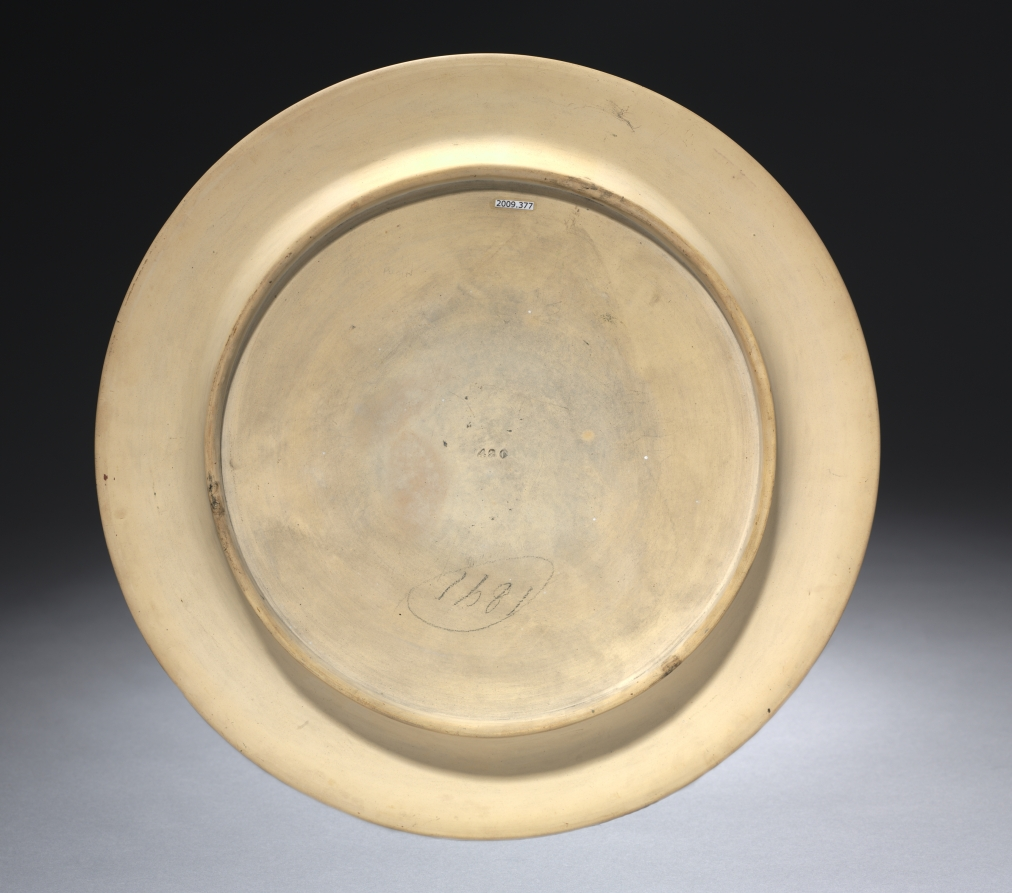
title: Bread Plate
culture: England, 19th century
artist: Augustus Welby Northmore Pugin (British, 1812–1852)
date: c. 1850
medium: stoneware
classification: Ceramic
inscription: around the perimeter of the plate "Waste Not Want Not"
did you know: This English architect, designer, artist, and critic who made this is remembered for pioneering the Gothic Revival style of architecture.